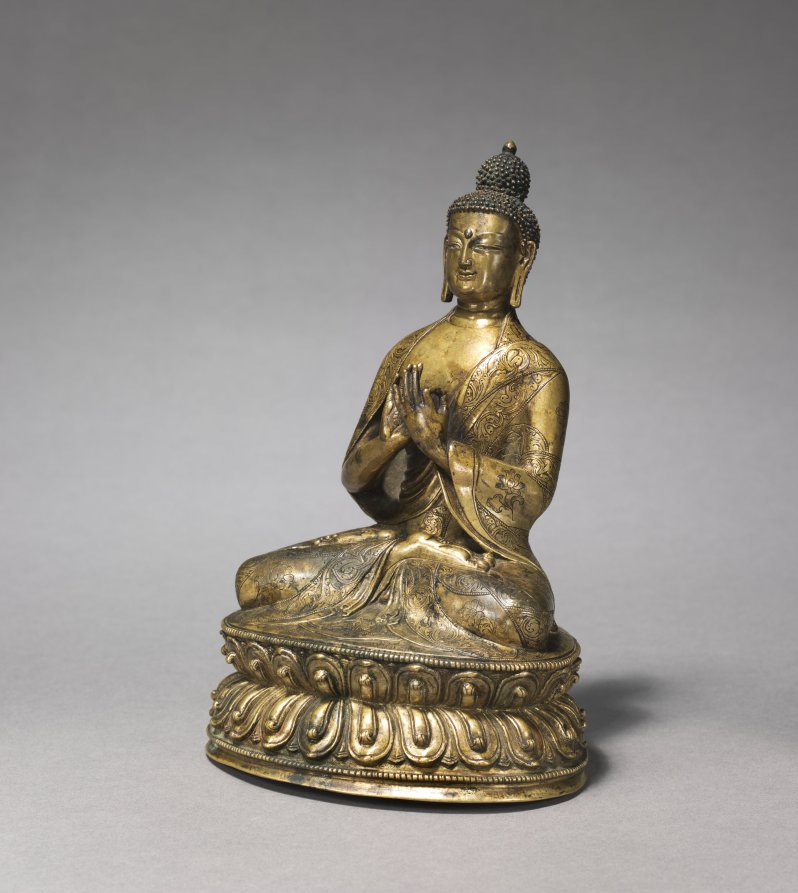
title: Seated Maitreya Buddha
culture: Western Tibet, Yongle Period (1403-1424)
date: c. 1400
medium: bronze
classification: Sculpture